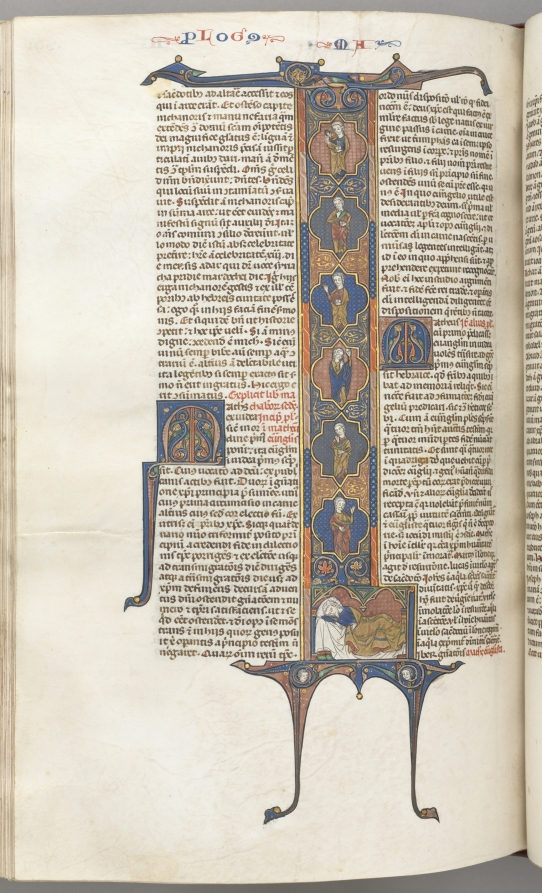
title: Fol. 391v, Matthew, full-length historiated initial L, the Tree of Jesse, with a sleeping Jesse at the base and six of the ancestors of Christ in irregular compartments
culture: Southern France, Toulouse(?), 13th century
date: c. 1275–1300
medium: ink, tempera and gold on vellum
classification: Bound Volume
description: Biblical manuscripts were highly prized and important possessions of churches, monasteries, cathedral schools, and universities throughout medieval Europe. The biblical texts were known as the vulgate, the translations made by Saint Jerome in the fourth century from Hebrew and Greek into Latin, which became the definitive and official Latin version of the Roman Church. In the 13th century, the bible was, for the first time, produced as a single volume with an officially sanctioned sequence to its books and chapters as illustrated by this example. The very extensive decoration of this bible is arranged hierarchically to indicate the relative importance of the various texts so that full or almost full-page initials mark the openings of the first prologue, Genesis, and the first Gospel; historiated initials mark the beginning of each book and illuminated initials mark the Prologues.